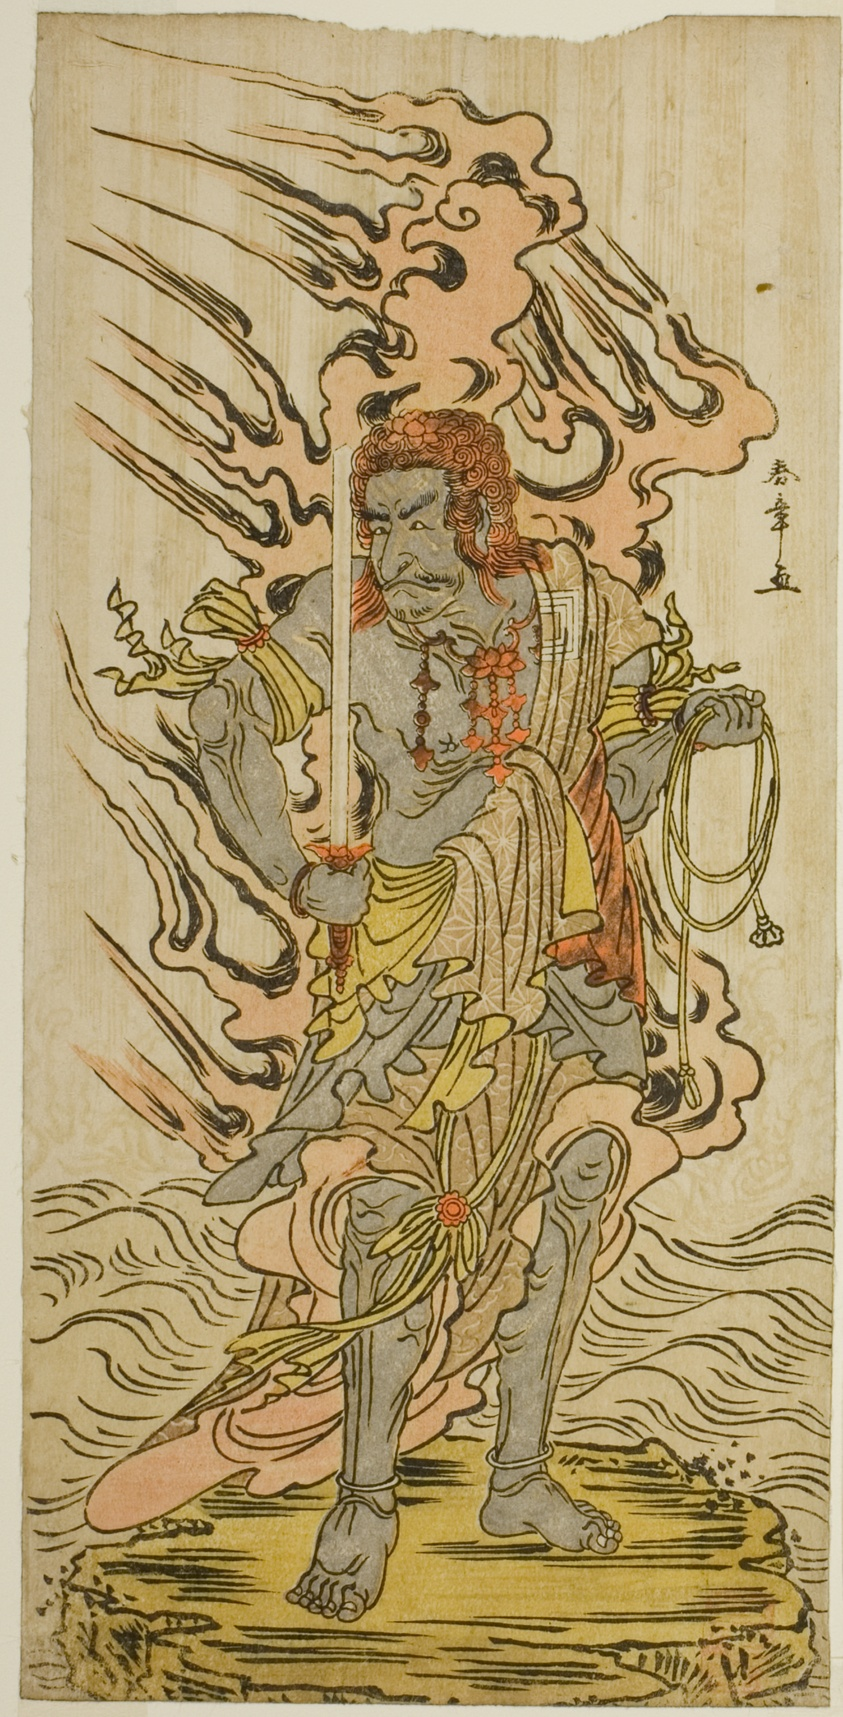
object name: Print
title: The Actor Ichikawa Danjuro V as a Stone Image of Fudo Myoo in the Play Kitekaeru Nishiki no Wakayaka, Performed at the Nakamura Theater in the Eleventh Month, 1780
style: Japanese (culture or style)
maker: Katsukawa Shunsho 勝川 春章; Japanese, 1726-1792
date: c. 1780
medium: Color woodblock print; hosoban; left sheet of diptych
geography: Japan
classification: woodblock print; print; asian art